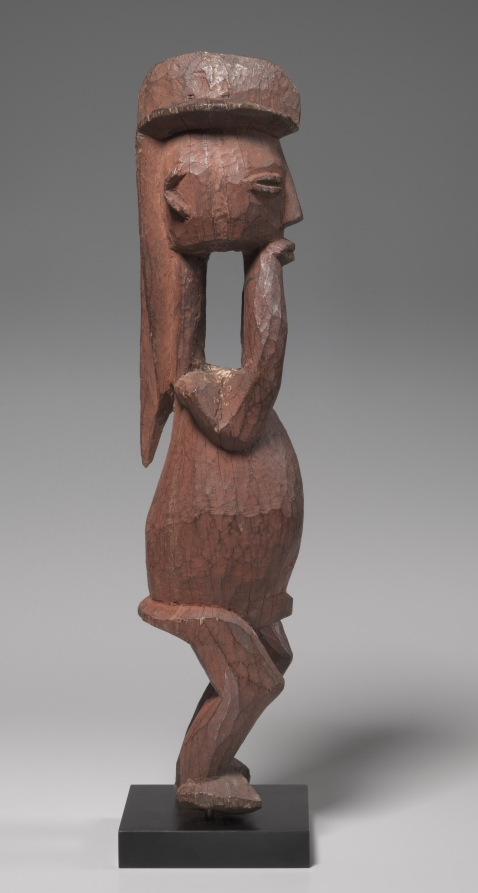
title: Male Figure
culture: Africa, Central Africa, Democratic Republic of Congo, Hungaan-style maker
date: mid- to late 1800s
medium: Wood and colorant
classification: Sculpture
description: Hungaan figures of this size served as guardians of ritual shrines and functioned in rituals to promote fertility, guarantee well-being, and ensure longevity. The striking crested hairstyle imitates a real coiffure or a wig, indicative of status and prestige. The hands supporting the chin identify the figure as a chief who is immersed in thought and contemplation, pondering over his responsibilities.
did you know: The red powdery surface of this figure mimics a red body adornment that mixed ground camwood with palm oil.